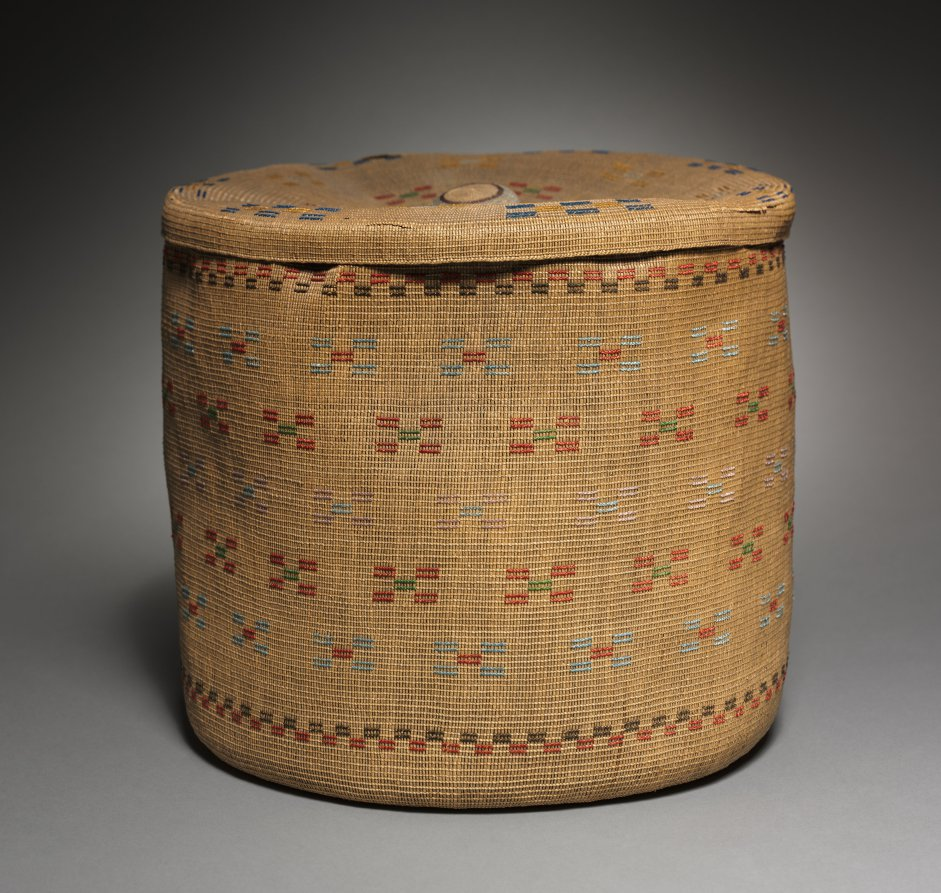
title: Covered Twined Cylindrical Basket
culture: Arctic. Aleut (Attu), late 19th-early 20th century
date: late 1800s–early 1900s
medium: twined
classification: Basketry